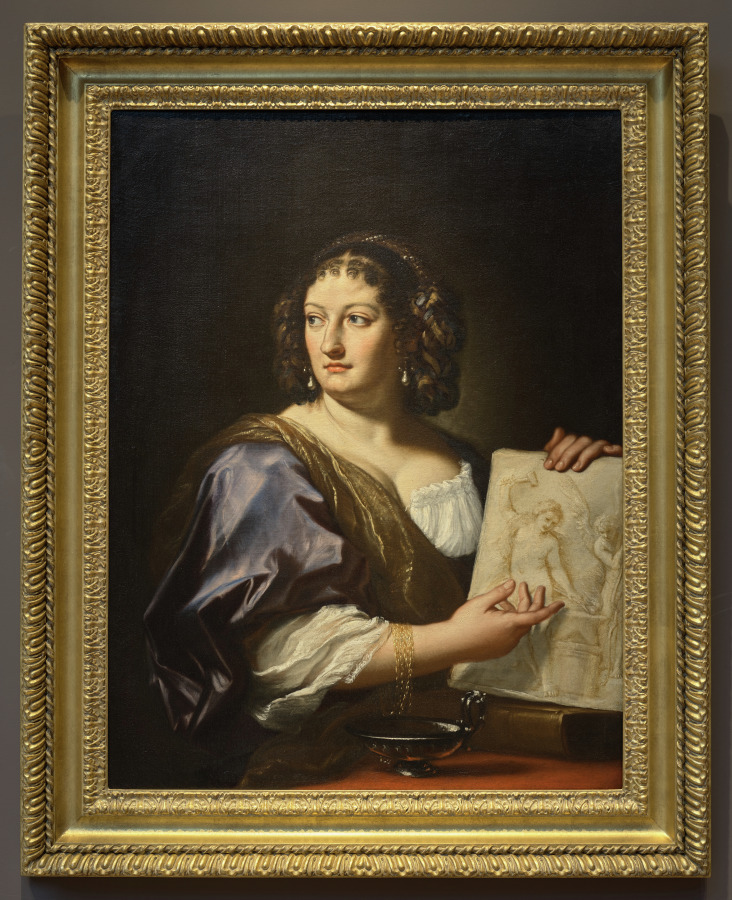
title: Portrait of Francesca Gommi Maratti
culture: Italy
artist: Carlo Maratti (Italian, 1625–1713)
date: c. 1701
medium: Oil on canvas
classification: Painting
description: In 1700 Carlo Maratti’s wife died, permitting him to marry his longtime mistress, Francesca Gommi, who began modeling for the artist in the 1670s and was the mother of his only child, Faustina. This painting was presumably painted shortly after the marriage as an homage from the artist to his new wife. To introduce an allegorical element into the composition, Maratti included a painting within a painting—in this case a drawing depicting Venus forging the love-darts of her adolescent son Cupid, suggesting that love will conquer all.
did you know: The sitter holds a drawing representing Venus making Cupid's weapons, symbolizing the power of love to conquer all.